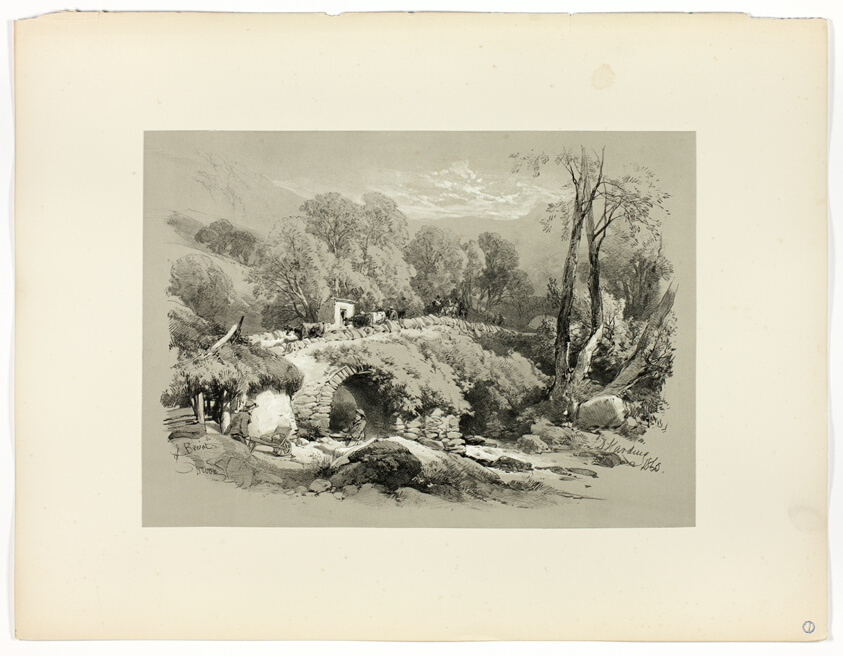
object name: Print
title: South Brent, Devon, from Picturesque Selections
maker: James Duffield Harding, (English, 1798-1863); Published by W. Kent and Co.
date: 1860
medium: Lithograph on paper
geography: England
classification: lithograph; print; prints and drawing